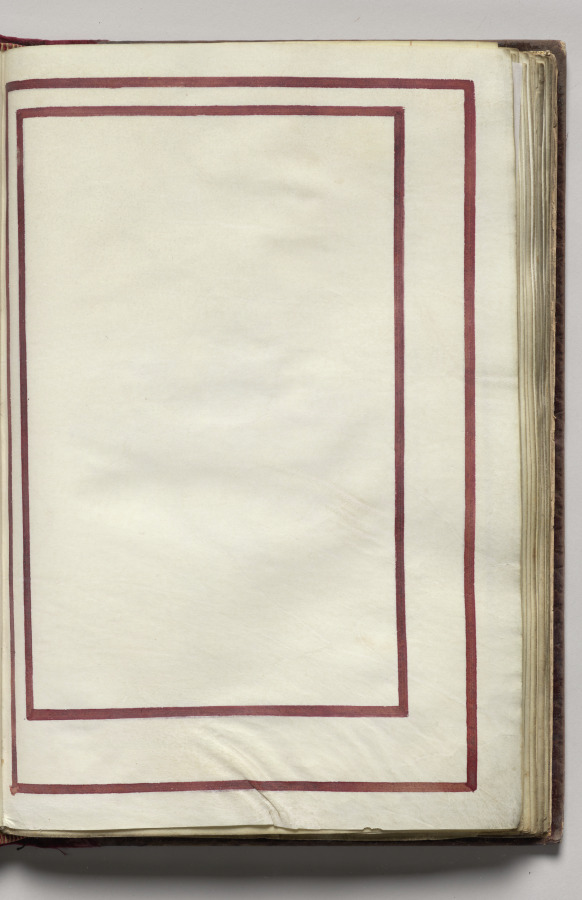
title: Border, folio 12 (recto), from Florilegium (A Book of Flower Studies)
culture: France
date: 1608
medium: watercolor, ink, silver and gold over occasional traces of pencil, on vellum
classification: Bound Volume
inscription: Dated: Poitiers 1608 (on frontispiece) Signed: On frontispiece in black ink, lower right: Van Kuyk Notation on drawing: Frontispiece: in pencil, lower margin: * élève de Van Kessel, peintre flammand (* in pencil also appears in front of Van Kuyk's name).